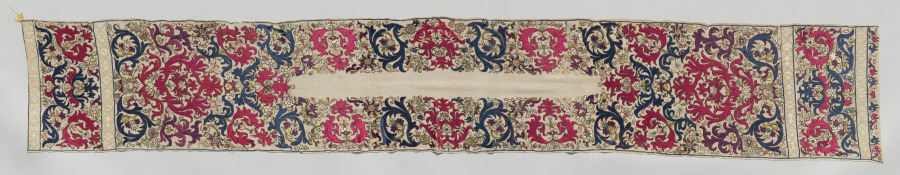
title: Headkerchief (tensifa)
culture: Africa, North Africa, Algeria, Algerian embroiderer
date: 1700s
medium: Linen, silk, gold, silver, dye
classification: Embroidery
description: This beautiful kerchief, worn wrapped around the head, was part of elegant bathing equipment that well-to-do women wore while relaxing in a hammam after bathing. The floral and foliate embroidery reflect a fashion that lasted for more than a century. This example is dominated by brilliant crimson and blue silk stitches.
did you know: This textile was displayed in the CMA’s first exhibition in 1916. While it is from North Africa, it was displayed in the "Nearer East" gallery.